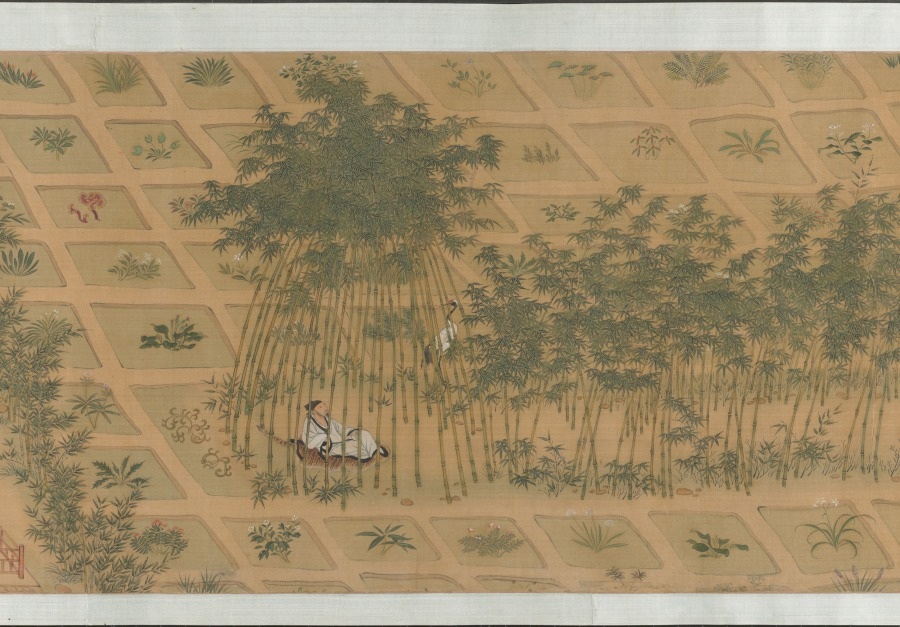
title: Garden for Solitary Enjoyment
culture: China, Ming dynasty (1368–1644)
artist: Qiu Ying (Chinese, 1494–1552)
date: 1515–52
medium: Handscroll; ink and light color on silk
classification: Painting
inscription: Accompanying text of an essay together with seven poems of Sima Guang (1019–1086) and one poem of Su Shi (1037–1101) written by Wen Zhengming (1470–1559) in 1558.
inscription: 2 colophons and 82 seals: 4 seals of Wen Zhengming 文徵明 (1470–1559); 59 seals of Xiang Yuanbian 項元汴 (1525–1590); 1 colophon, dated 1644, and 7 seals of Xiang Yukui 項禹揆 (c. late 1500s–1659); 1 colophon, dated 1880, and 2 seals of Weng Tonghe 翁同龢 (1830–1904); 2 seals of Ch'eng Chen-i (19th c.); 1 seal of Han Ch'ung (19th c.); 4 seals of Wan-go H. C. Weng 翁萬戈 (1918–2020); 3 seals unidentified.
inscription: Colophon by Xiang Yukui 項禹揆 (c. late 1500s–1659): The painting of The Garden for Self-enjoyment on the right by Shih-chou, Mr. Qiu [Qiu Ying] is in the style of Li Lung-mien. Its mood is peaceful, as if meeting the ancient gentlemen face to face among the brushes and silk; it lifts one above the sordid bustle of life. Formerly, my late father handed me this scroll which had only the painting without the written essay. I considered asking a good calligrapher to write the essay to add to it but was afraid that the quality of the writing would not match the painting. Several years later, I saw at a friend's house this essay and poems (of Ssu-ma Kuang] written by Hengshan [Wen Zhengming], once owned by my grandfather; so I spared no expense to obtain it. I rejoiced at this and said: "The divine swords are finally united. How things are pre-destined!" Now my friend Chang Kung-chao's technique for mounting [painting and calligraphy] is excellent. Therefore by daring to take them out and join them together, I can preserve this beautiful story of singular reunion. Xiang Yukui recorded at Hai-yeh-t'ang [hall] two days before New Year's Eve in the jiasheng year of the Chongzhen era [1644]. trans. LYSL/HK/WKH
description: Garden of Solitary Enjoyment refers to a site built in 1073 by the statesman Sima Guang (1019–1086) after he had retired to Luoyang, Henan province. Every spring, visitors would flock to his garden. Each of its seven structures references a historic figure. Sima wrote: I channel streams [like Du Mu], to water flowers [like Bai Juyi], or trim bamboo [like Wang Huizhi]. . . . I know of no joy between heaven and earth that could take its place. Qiu Ying’s painting, created after an 11th-century version of the same theme, must have appealed to garden owners of the Ming dynasty, since it became the template for numerous Suzhou workshop copies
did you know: Sima Guang completed his monumental survey of Chinese history, Zizhi tongjian, in the garden depicted in this painting.